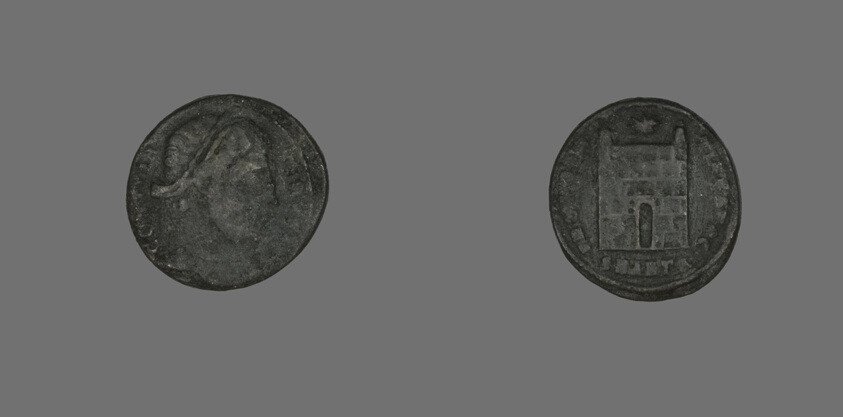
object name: Coin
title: Coin Portraying Emperor Constantine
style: roman (ancient, style or period), ancient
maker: Roman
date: 272-337, probably 327-329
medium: Bronze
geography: Roman Empire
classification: coin; ancient art